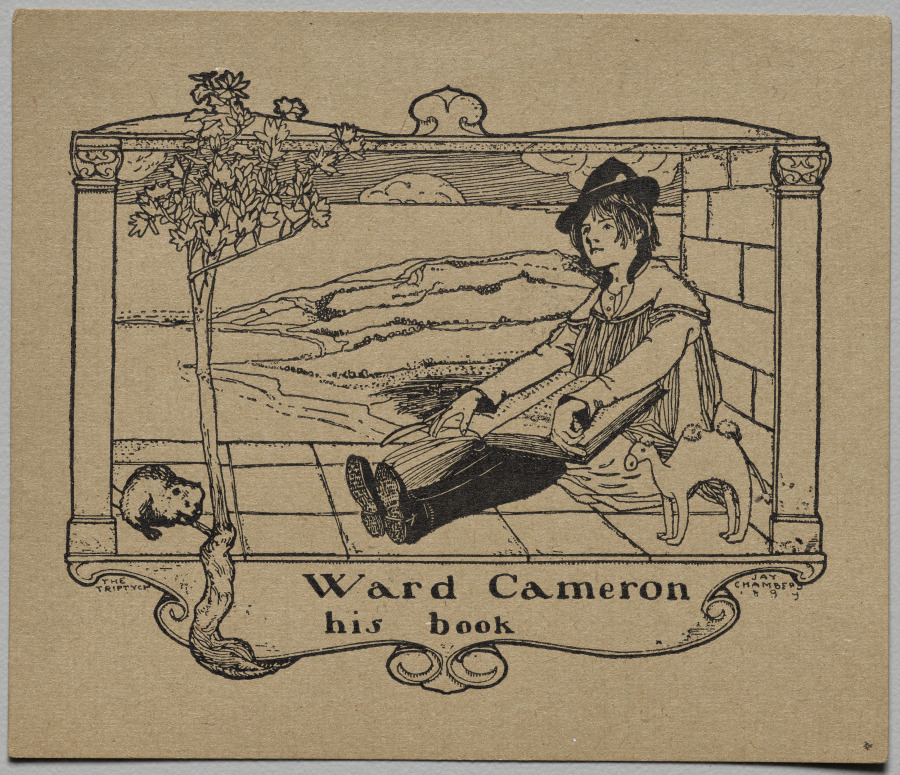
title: Bookplate: Ward Cameron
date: 1899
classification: Print